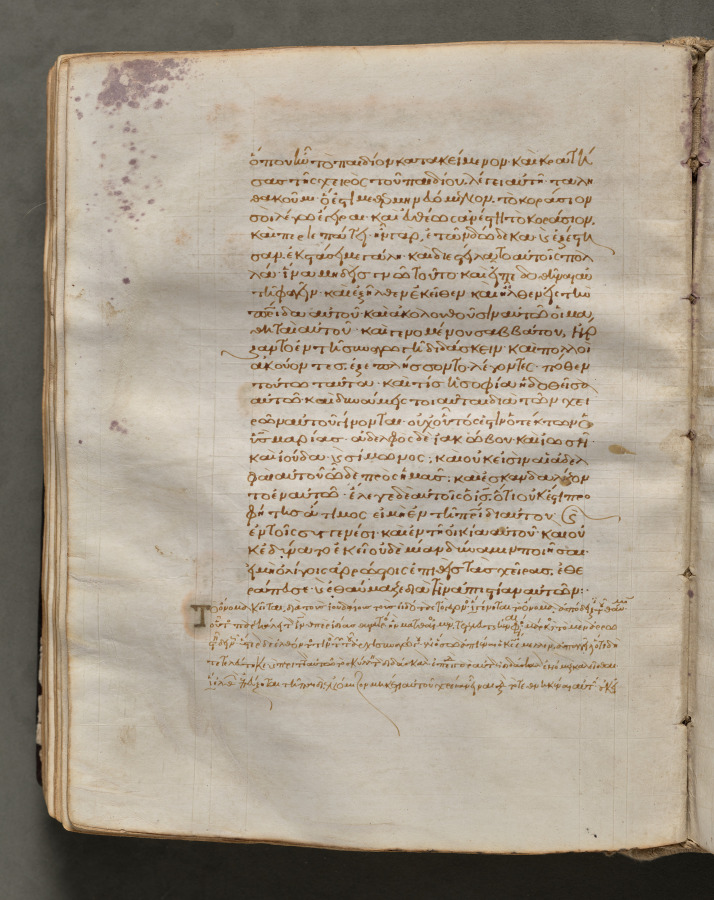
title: Text, folio 149 (verso), from a Gospel Book with Commentaries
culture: Byzantium, Constantinople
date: c. 1000–1100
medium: ink, tempera, and gold on vellum; leather binding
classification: Bound Volume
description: Each of the four gospels in this book opens on a page with brilliantly illuminated borders depicting the author of the text as well as birds-principally peacocks, symbols of the immortality of the soul-and fountains, representing the fountain of life and the salvation of the soul. This volume consists of 428 leaves with texts in Greek. Its level of sophistication suggests that it was probably written and decorated in a monastery in Constantinople.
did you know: Gospel Books were carried in procession through Byzantine churches.